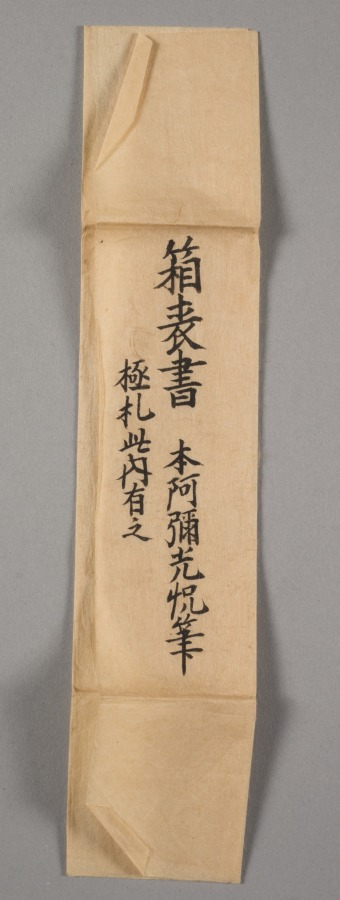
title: Hotei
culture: Japan, Muromachi period (1392–1573)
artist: Kichizan Minchō (Japanese, 1352–1431)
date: late 1300s–early 1400s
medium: hanging scroll; ink and slight color on paper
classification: Painting